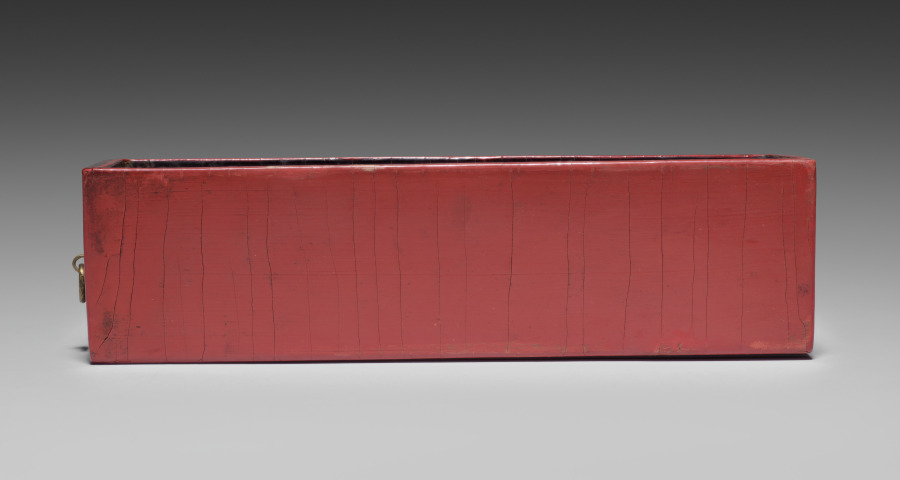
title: Drawer for a Tihong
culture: China, Ming dynasty (1368-1644), Wanli reign (1572-1620)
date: 1585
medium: carved cinnabar lacquer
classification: Lacquer